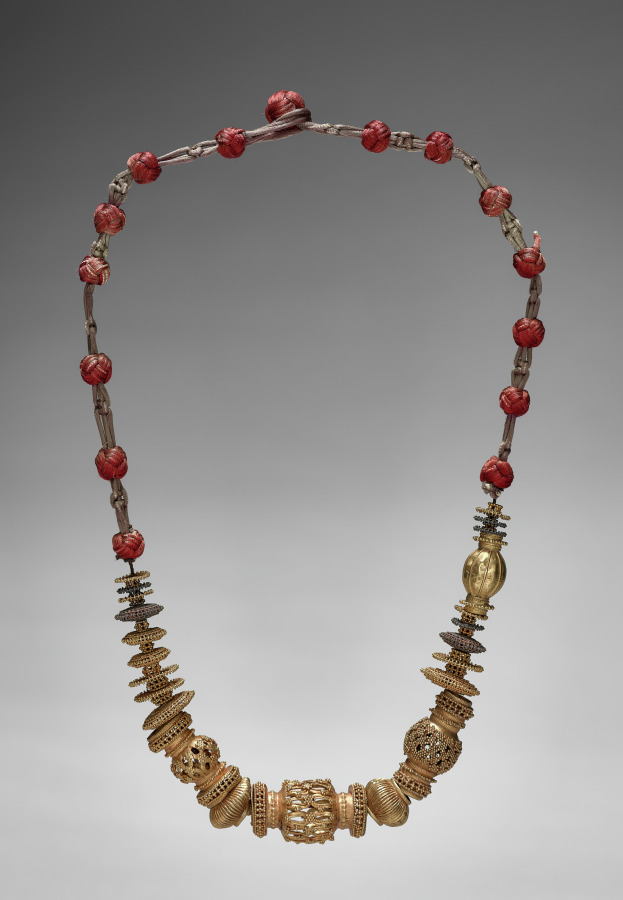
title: Necklace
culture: India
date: 1700s–1800s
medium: Gold filigree and granulation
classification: Jewelry